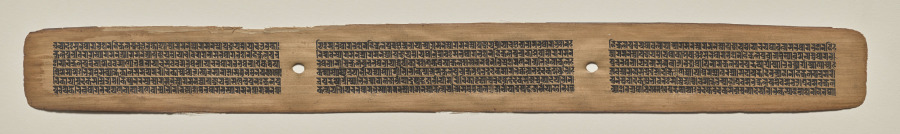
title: Text, folio 181 (recto), from a Manuscript of the Perfection of Wisdom in Eight Thousand Lines (Ashtasahasrika Prajnaparamita-sutra)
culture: Eastern India, Bihar, Vikramashila Monastery. Painting: Nepal, Kathmandu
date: Sunday, September 14, 1119 (year 239 of the Newar Samvat in the month of Ashvina)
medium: gum tempera and ink on palm leaves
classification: Painting